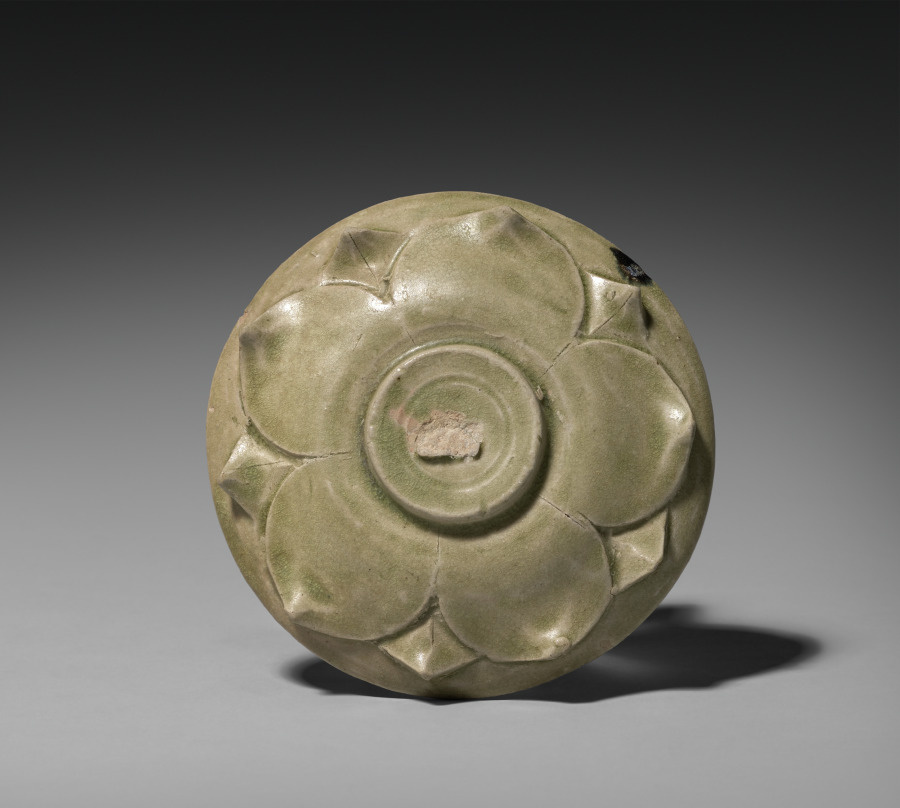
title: Covered Jar with Carved Lotus Petals (lid)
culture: China, Northern Dynasties period (386-581)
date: 386–581 CE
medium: Glazed stoneware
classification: Ceramic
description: This jar still has its original cover, which is rare among surviving examples. Its missing knob most likely had the shape of a lotus bud. Beautifully carved lotus petals cover the vessel’s shoulder and lid under a translucent green glaze. In Buddhism, the lotus is a flower symbolizing purity and detachment from worldly affairs; its presence suggests that this vessel was meant to be used in a religious context. The well-crafted double loop handles may have held a silk cloth or other textile that would have been folded over the lid to keep it in place. This aesthetic prefigures the celebrated green celadons in adjacent regions.